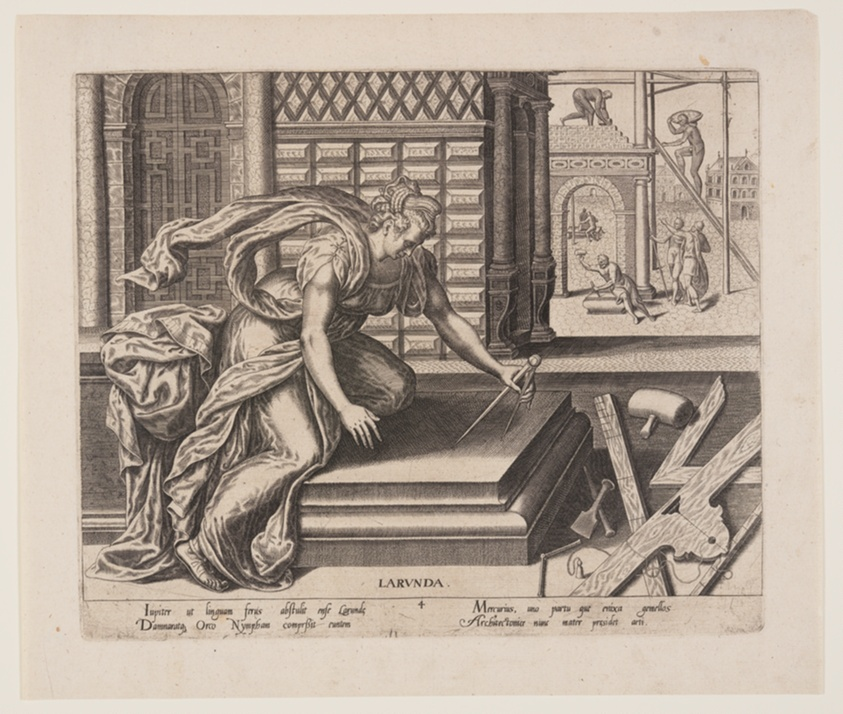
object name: Print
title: Larunda, from The Occupations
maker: Philip Galle; Flemish, 1537–1612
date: 1574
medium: Engraving on ivory laid paper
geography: Flanders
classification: engraving; paper; print; prints and drawing